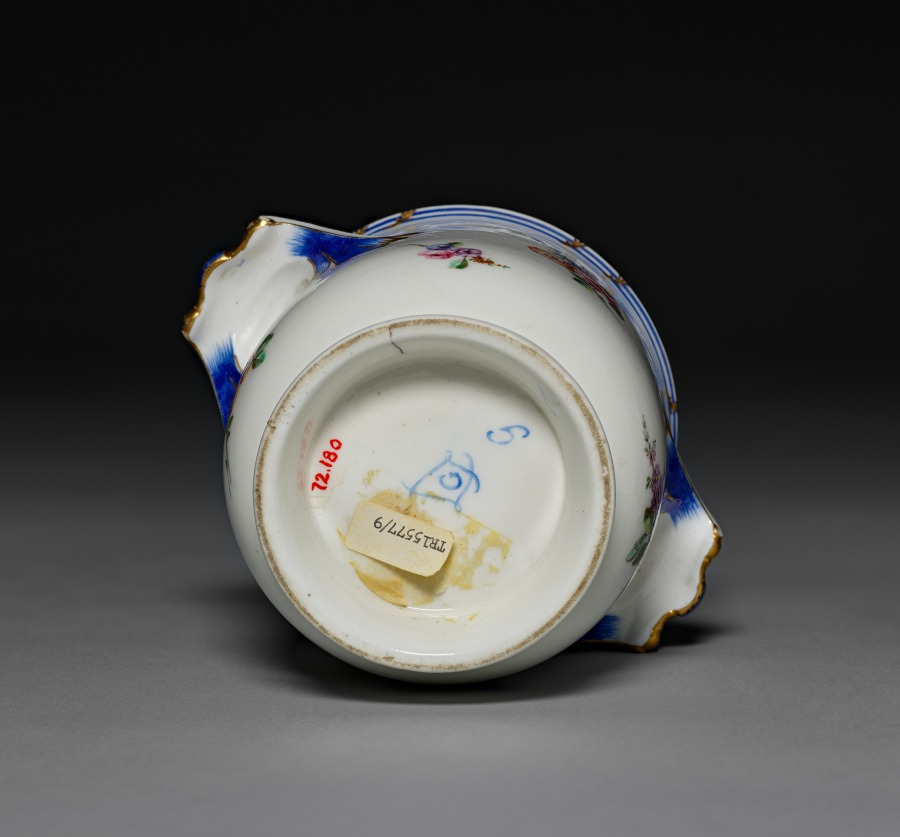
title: Glass Cooler (Seau à verre ordinaire)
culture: France, Sèvres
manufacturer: Sèvres Porcelain Factory (French, est. 1756)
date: 1759–60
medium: soft-paste porcelain with enamel and gilt decoration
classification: Ceramic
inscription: [Painter's mark, possibly for Claude-Joseph Cardin]: "g"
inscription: [Incised]: "LP"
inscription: [Incised] "2"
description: In 18th-century France, wine was traditionally drunk chilled. This object would have held crushed ice or ice water to chill small bottles or glasses. Shifts in the strict dining protocol of 18th-century France under Louis XV meant that bottle coolers would have been placed within reach of the diners, rather than their traditional placement on the side board.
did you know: A bottle cooler of this design was first purchased in 1752 by Madame de Pompadour, great patron of the Sèvres porcelain factory and official mistress of French King Louis XV.